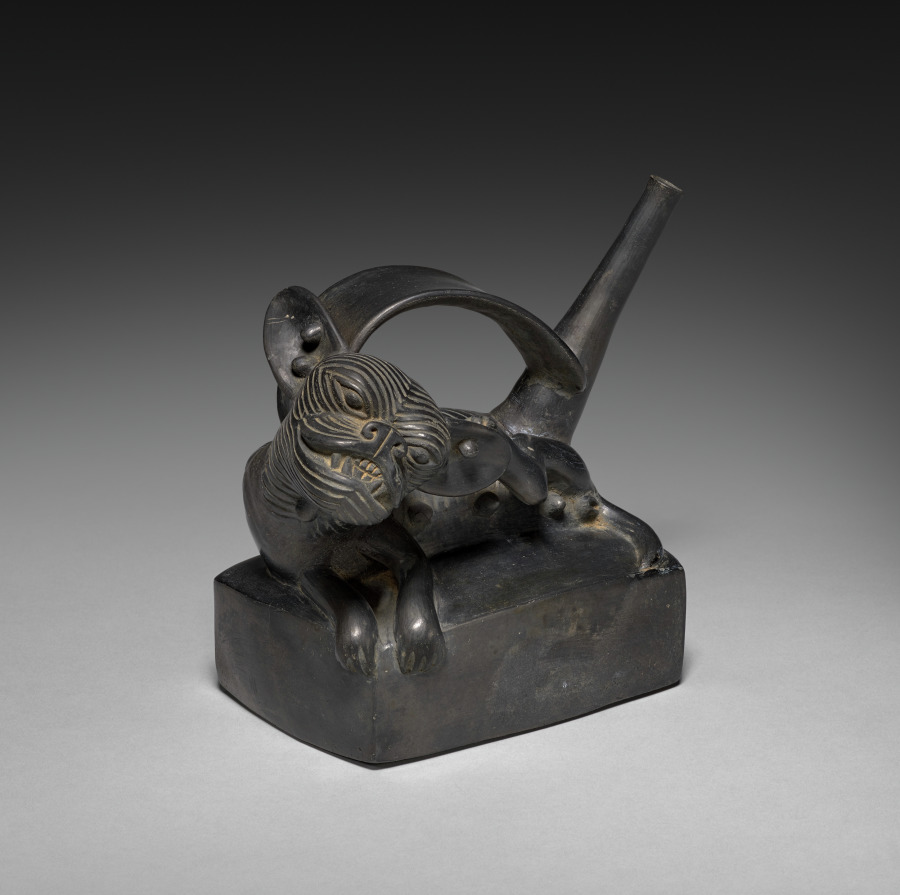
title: Vessel with Reclining Dog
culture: Central Andes, North Coast, Chimú-Inka style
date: 1470–1532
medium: ceramic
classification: Ceramic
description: This vessel represents a Peruvian hairless dog who has recently given birth and seems to be taking a break from maternal obligations. The meanings of such dogs may be connected to the trade networks that brought them to Peru from Mexico in the late pre-Hispanic period. Perhaps these foreign ties made them prestige animals whose breeding engendered further status for the owner.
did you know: This vessel represents a Peruvian hairless dog who has recently given birth.